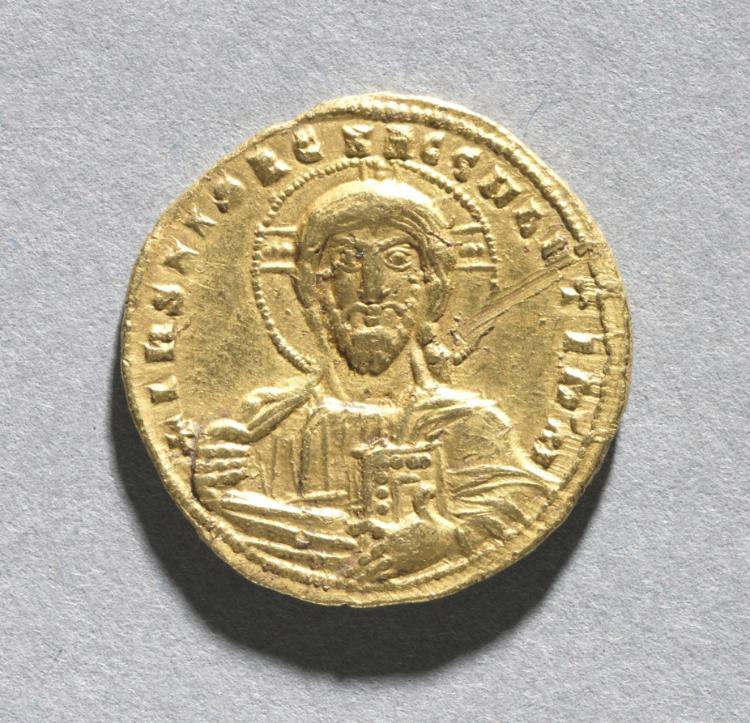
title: Nomisma with Nicephorus II Phocas (obverse)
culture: Byzantium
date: 963–969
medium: gold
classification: Coins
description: The vast number of surviving Byzantine coins attests to the level of trade across the empire. Controlled and supervised by the emperor, the producers of coins took care to represent his authority and reflect his stature. Talented artists were recruited to engrave the dies (molds) used for the striking of coins. Emperors increasingly came to include their heirs and co-emperors on their coinage, as well as other family members or even earlier rulers. Coins were recognized, then as now, as small, portable works of art. With their inscriptions and images, Byzantine coins provide valuable documentation of historical events and a record of the physical appearance of the emperors. The coins shown here include the solidus, the basic gold coin of 24 karats; the tremissis, a gold coin of one-third the weight and value of the solidus; and the nomisma, which in the 10th century replaced the solidus as the standard gold coin.